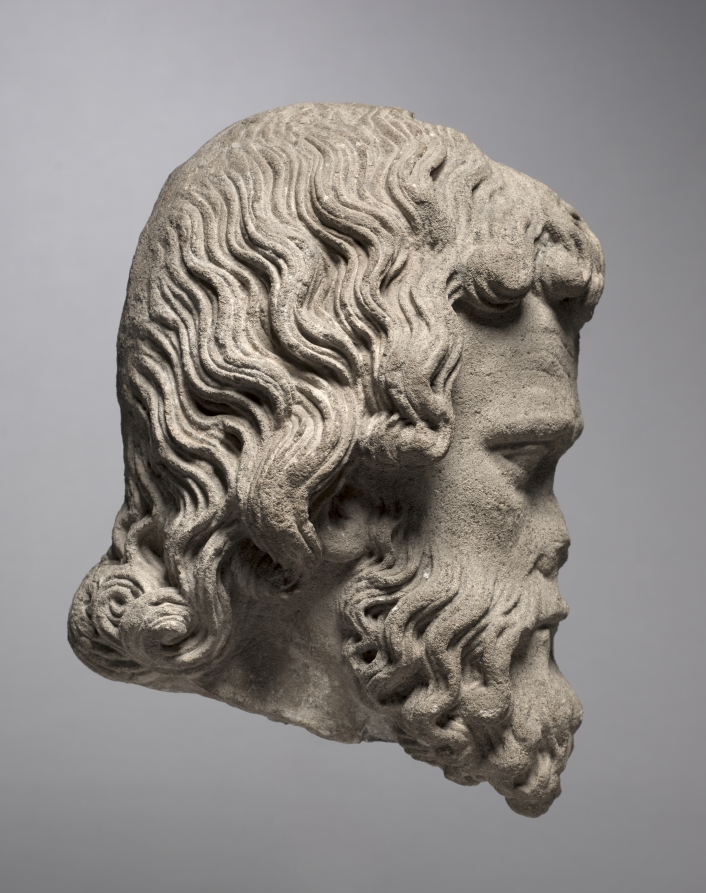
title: Head of an Apostle from the South Portal of the Cathedral of Thérouanne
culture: Northern France (Pas-de-Calais), Thérouanne, 13th century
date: c. 1235–1240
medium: oolitic limestone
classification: Sculpture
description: These monumental stone heads are among the substantial known remains of the sculptural program of Thérouanne’s cathedral, which was razed by Emperor Charles V of Spain in June 1553. These heads were found in a wall of rue Ste. Croix in the town of Saint Omer (a short distance to the north) in January 1923. This group of sculptures from the gable of the south portal of Thérouanne, which includes a stylistically related Christ as Judge, is recorded to have been moved to the Cathedral of Saint Omer in 1554. With their deeply carved wavy hair, curly beards, wrinkled foreheads, and ponderous facial features, these imposing heads—even in their now fragmentary and weathered state—attest to the powerful monumentality of the stone sculpture covering French church facades of the Gothic period.